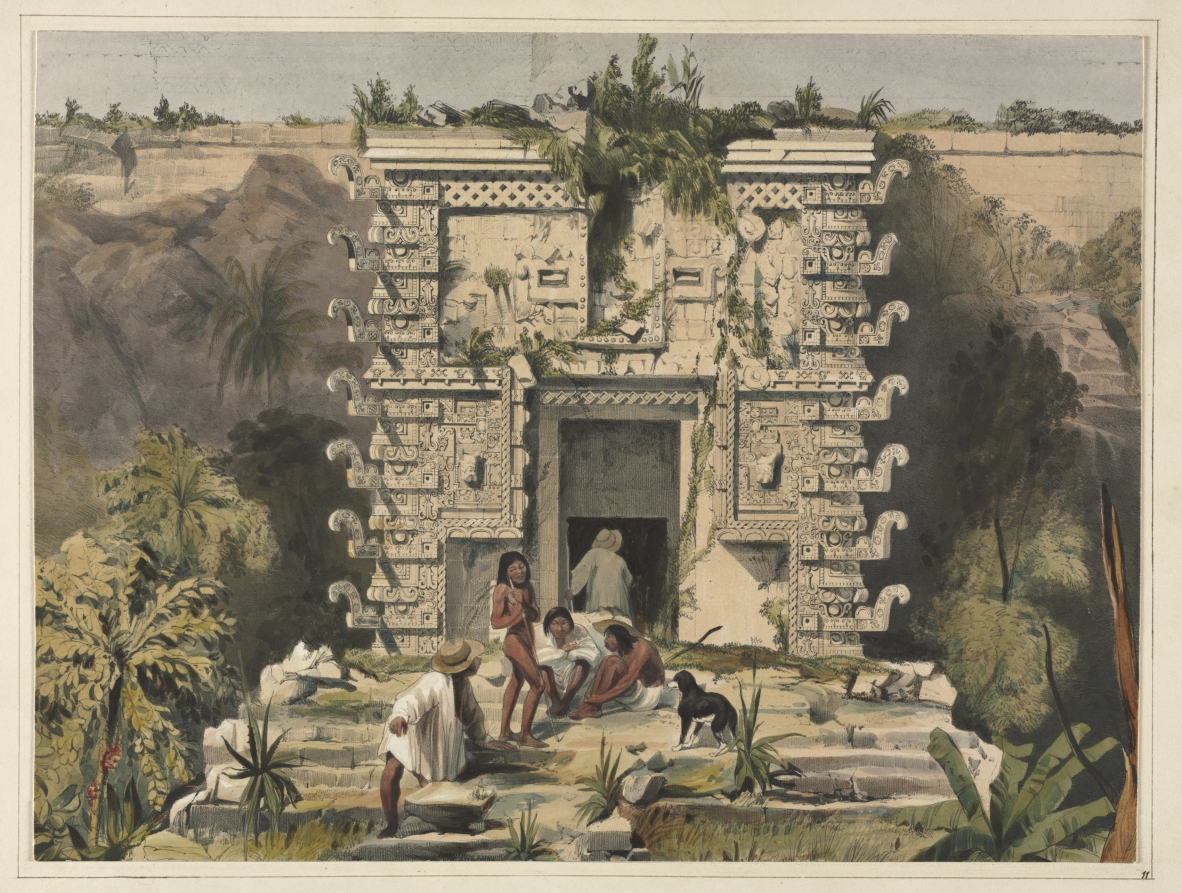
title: Gateway of the Great Teocallis, Uxmal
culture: England, 19th century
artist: Frederick Catherwood (British, 1799–1854)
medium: lithograph, hand colored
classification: Print